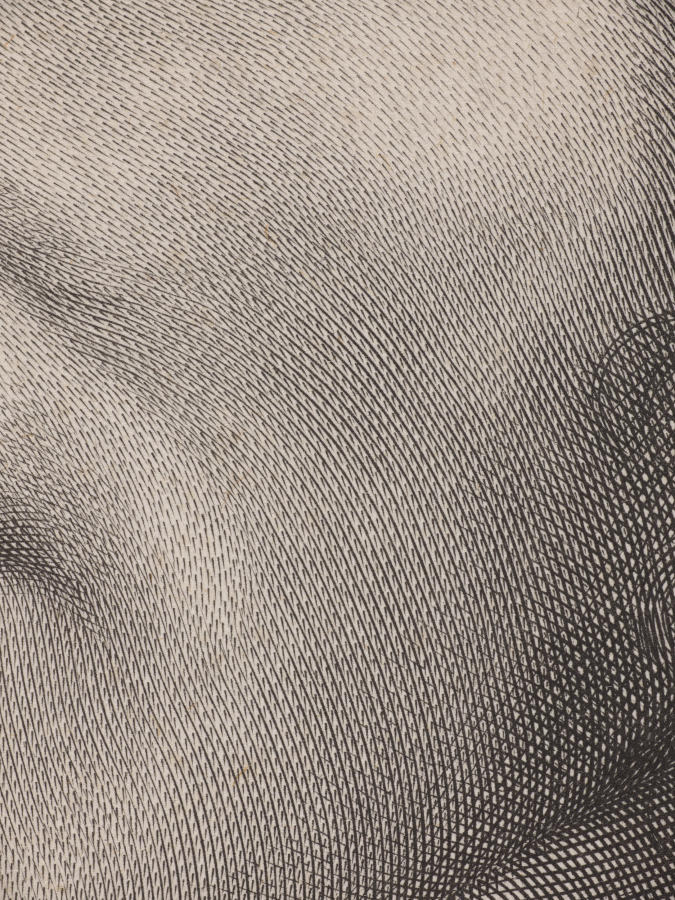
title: Louis XIV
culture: France, 17th century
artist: Robert Nanteuil (French, 1623–1678)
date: 1664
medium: engraving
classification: Print